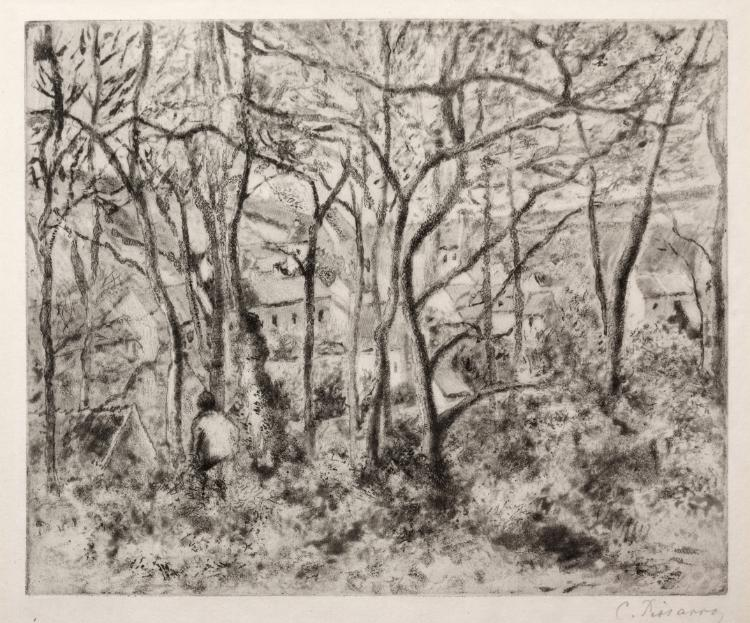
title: Wooded Landscape at L'Hermitage, Pontoise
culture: France, 19th century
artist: Camille Pissarro (French, 1830–1903)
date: 1879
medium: softground, aquatint, and drypoint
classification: Print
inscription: lower right, in graphite: C. Pissarro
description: Camille Pissarro depicted this view of Pontoise, the Parisian suburb where he lived at the time, using a range of etching techniques. He evoked the effects of natural light amid the shadowy forest by combining grainy aquatint with softground—a process that creates loose, painterly lines and tone. Although primarily known as painters, many of the Impressionists took up printmaking, developing new techniques to translate the effects of natural light. Pissarro, especially, experimented with etching, working extensively with the technique alongside Edgar Degas around the time this print was made.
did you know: Pissarro made this print for the journal Le Jour et la nuit that he planned with Edgar Degas, but was never realized.